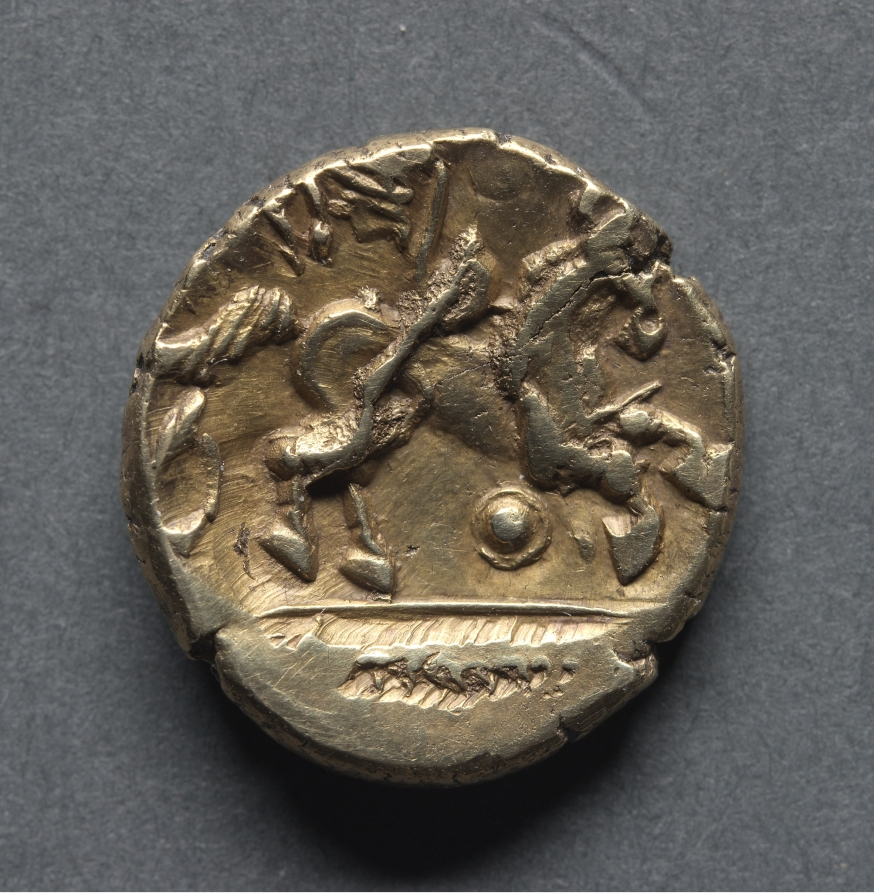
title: Stater: Horse and Wing Motif (reverse)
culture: England, Catuvellauni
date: c. 60–20 BCE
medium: gold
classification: Coins